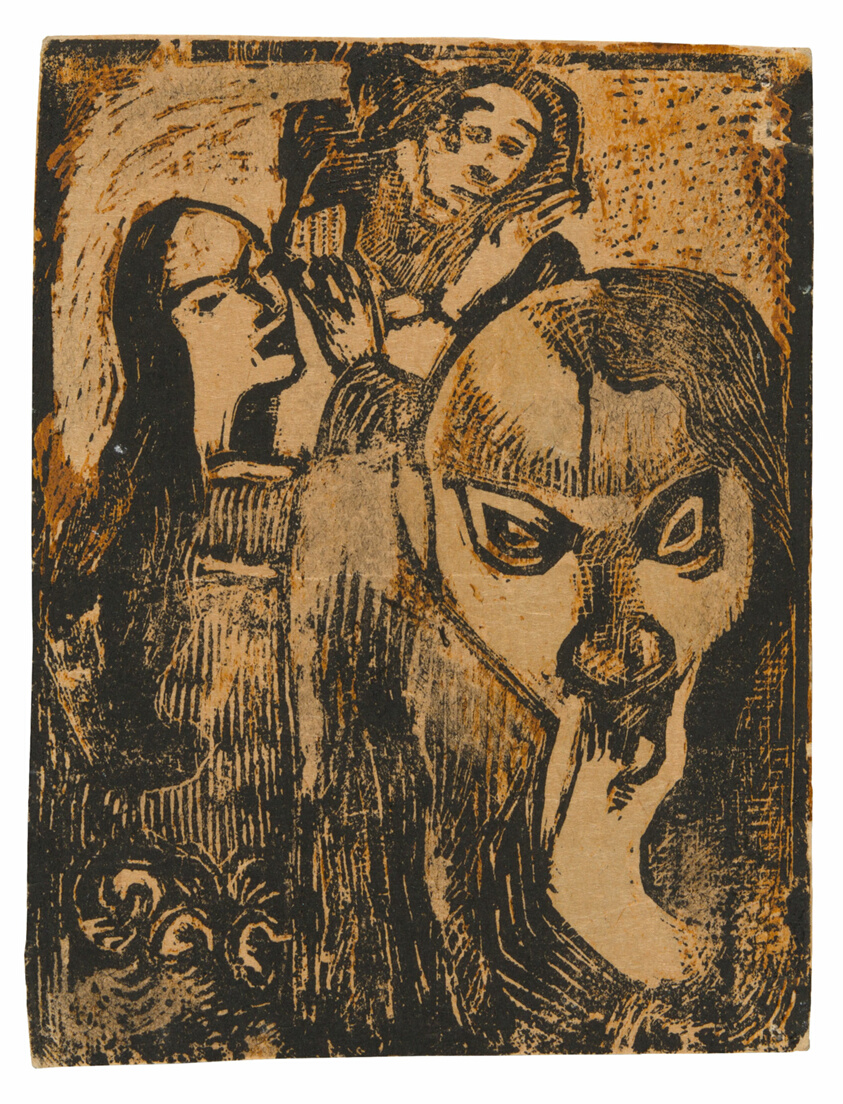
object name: Print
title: Memory of Meijer de Haan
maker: Paul Gauguin (French, 1848-1903)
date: 1896/97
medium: Wood-block print printed twice in black and brown ink, with dry brush and gray and ocher watercolor, on cream Japanese paper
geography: France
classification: woodcut; print; prints and drawing